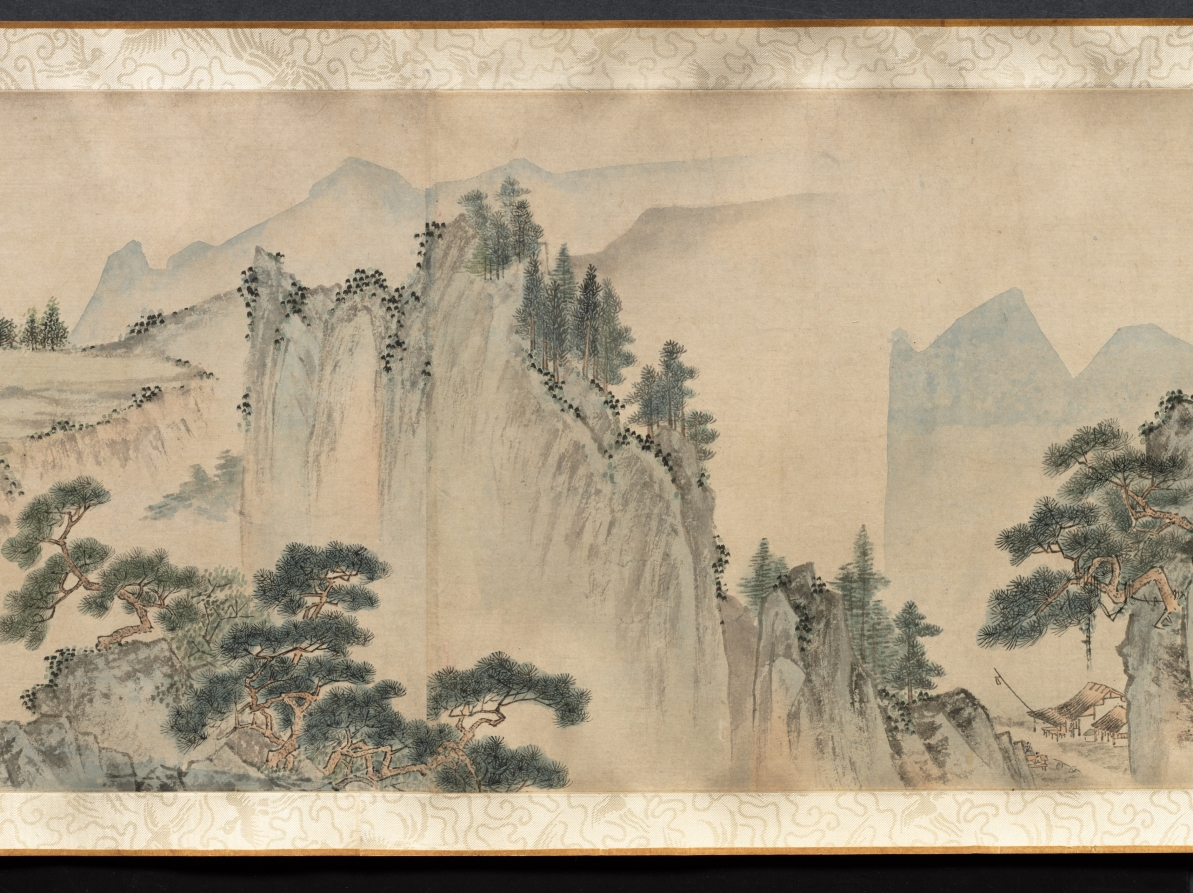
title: Ten Thousand Li of the Yangzi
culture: China, Ming dynasty (1368–1644)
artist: Dai Jin (Chinese, 1388–1462)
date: c. 1400s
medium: Handscroll; ink and color on paper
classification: Painting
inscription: Two colophons at end. Artist's seals: Dai Jin 戴進 and Wenjin 文進.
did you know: Dai Jin is traditionally considered the founder of the Zhe School, a style of landscape painting.